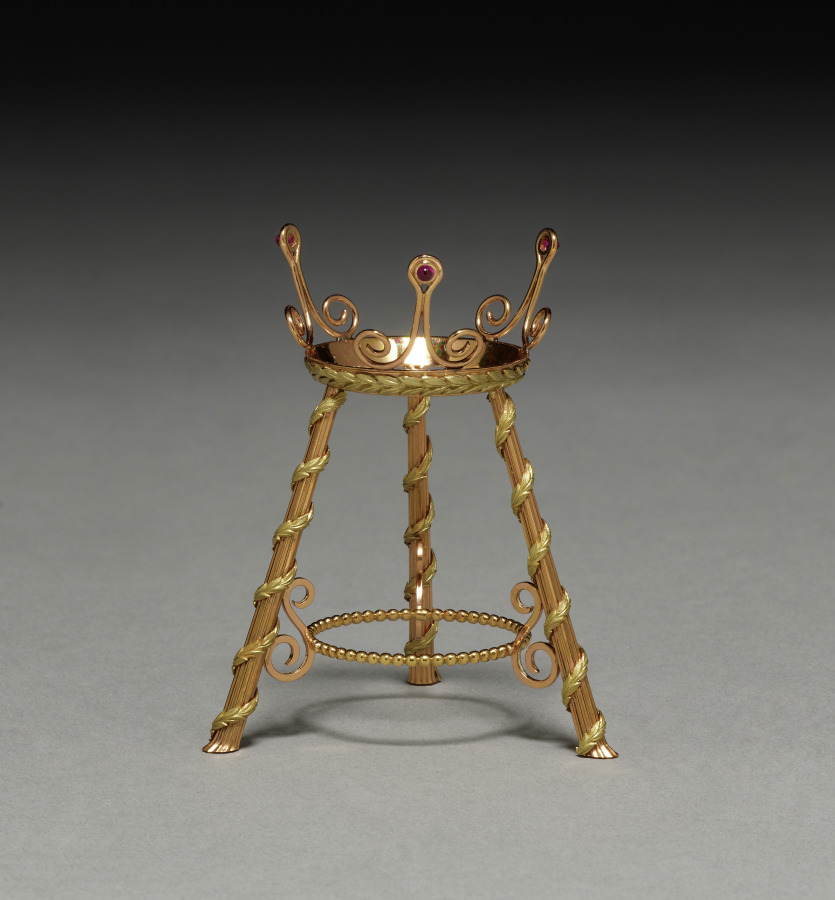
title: Gold Stand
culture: Russia, St. Petersburg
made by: Alexander Edward Tillander (Russian, 1837–1918)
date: before 1896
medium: gold, enamel, sapphire, gold easel and stand, photograph covered with faceted green glass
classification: Miscellaneous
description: In the Russian Orthodox religious tradition, eggs are offered as Easter gifts to symbolize rebirth, renewal, and the resurrection of Christ. This jeweled Russian egg is engraved with XB symbolizing the phrase, “Christ is risen,” and would have been given to a lady in a wealthy household, perhaps someone of high rank within the imperial court, given the richness of materials.